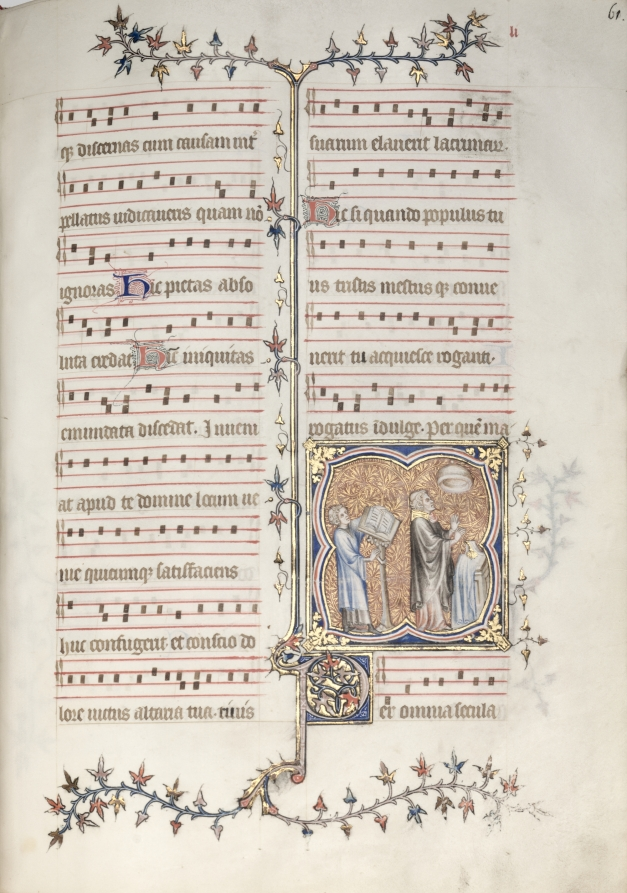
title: The Gotha Missal: Fol. 61r, A Priest Singing the Office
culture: France, Paris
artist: Master of the Boqueteaux (French)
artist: and Workshop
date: c. 1375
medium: ink, tempera, and gold on vellum; blind-tooled leather binding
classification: Bound Volume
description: The style and quality of this manuscript's decoration is typical of deluxe Parisian books made for aristocratic or royal patrons. Most of the book's decoration appears to be the work of the Master of the Boqueteaux, an artist active at the court of King Charles V (died 1380). His style was apparently shared by a number of book illuminators working in and around Paris. It is very possible that the Gotha Missal belonged to Charles V, but is not provable because the manuscript has no royal portraits and lacks a colophon. Given the book's magnificent decoration, however, it would seem that it was produced for a Valois prince, if not for the king himself. The manuscript receives its name from the German dukes of Gotha, its later owners.